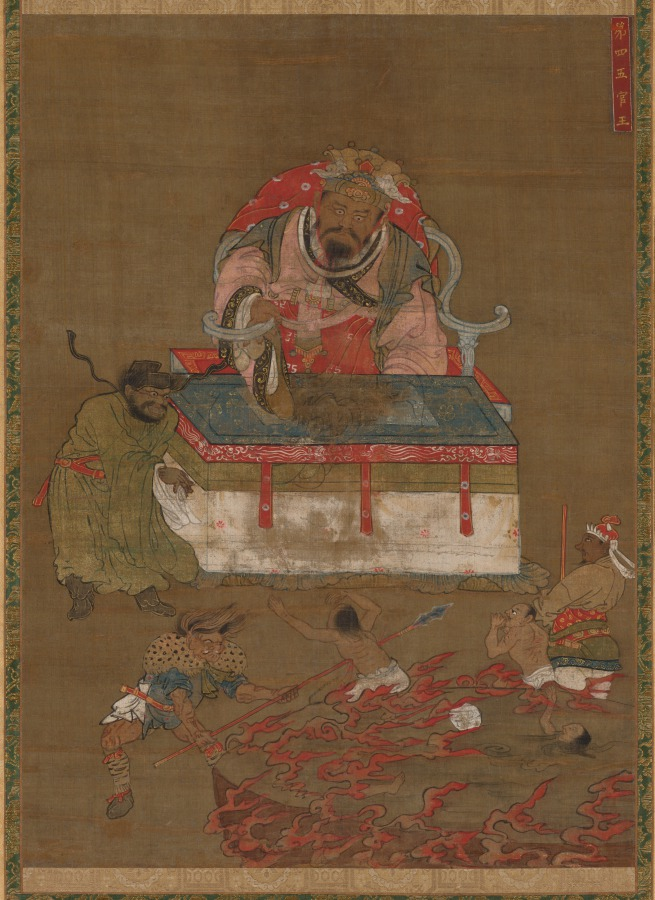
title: The Fourth King of Hell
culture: Korea, Goryeo dynasty (918–1392)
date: late 1300s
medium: Hanging scroll; ink, color, and gold ink on silk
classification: Painting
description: Originally part of a set of ten, this hanging scroll depicts the Fourth King of Hell. Accompanied by his secretary, the king with bulging eyes is seated at the center, overseeing how well his verdict is being conducted. On the bottom, sinners are suffering in a giant cauldron filled with boiling water, constantly pierced by a guard’s burning spears. Ready-made Buddhist paintings from China, created in professional workshops in the port city of Ningbo, are believed to one of the important inspirations for this hell scene.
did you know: As the concept of salvation became increasingly more emphasized in Buddhist schools in medieval East Asia, the gruesome depiction of various hells was given an important role: to promote Buddhist ethics. In the Buddhist infernal otherworld, the Ten Kings of Hell serve as judges of the deceased to determine their fates, including the type and severity of punishment.